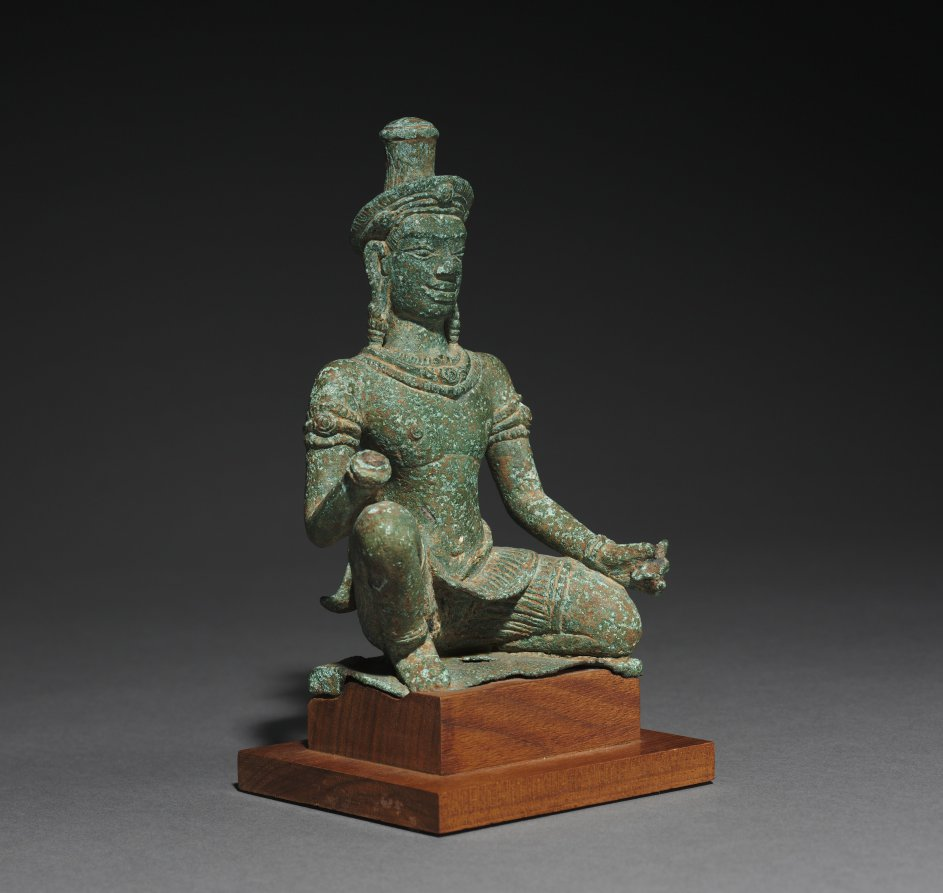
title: Kneeling Worshipper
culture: Cambodia, Angkor Wat style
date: 1100s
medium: bronze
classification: Sculpture